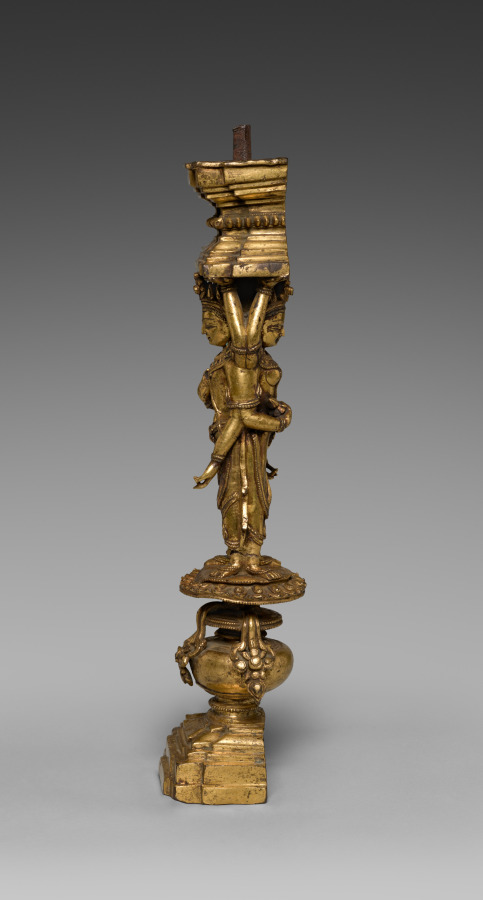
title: Support with Addorsed Figures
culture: Tibet, Densatil Monastery, 15th century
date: 1400s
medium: gilt bronze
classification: Sculpture